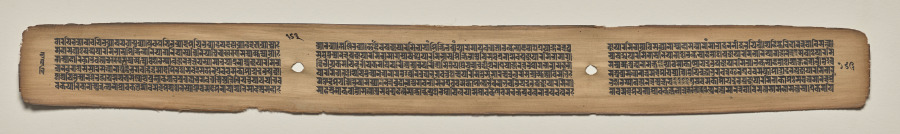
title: Text, folio 163 (verso), from a Manuscript of the Perfection of Wisdom in Eight Thousand Lines (Ashtasahasrika Prajnaparamita-sutra)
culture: Eastern India, Bihar, Vikramashila Monastery. Painting: Nepal, Kathmandu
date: Sunday, September 14, 1119 (year 239 of the Newar Samvat in the month of Ashvina)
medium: gum tempera and ink on palm leaves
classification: Painting